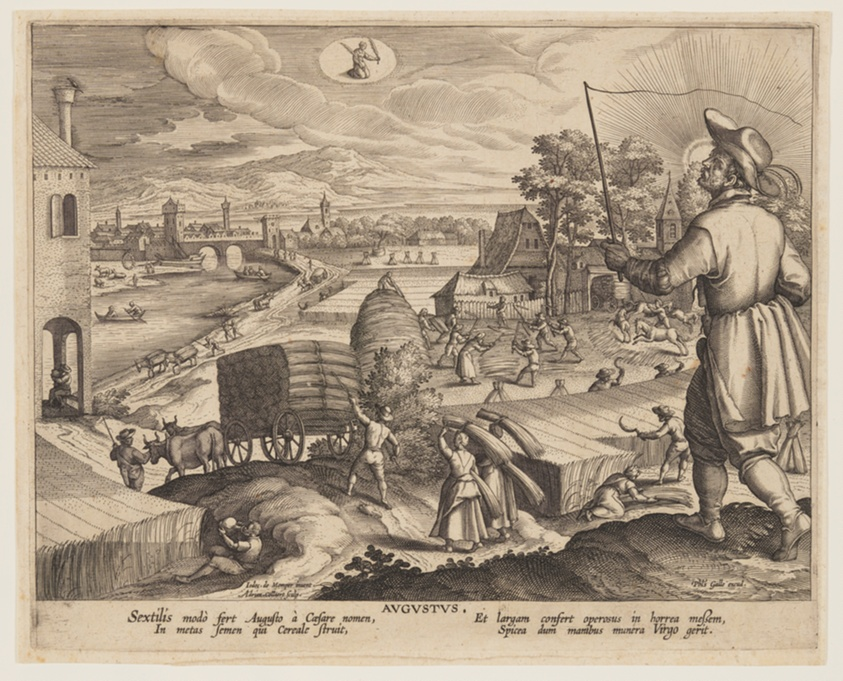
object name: Print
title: August, from Twelve Months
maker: Adriaen Collaert (Flemish, c. 1560–1618); after Joos de Momper (Flemish, 1564-1635)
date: 1609-1610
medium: Engraving on ivory laid paper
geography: Flanders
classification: engraving; paper; print; prints and drawing